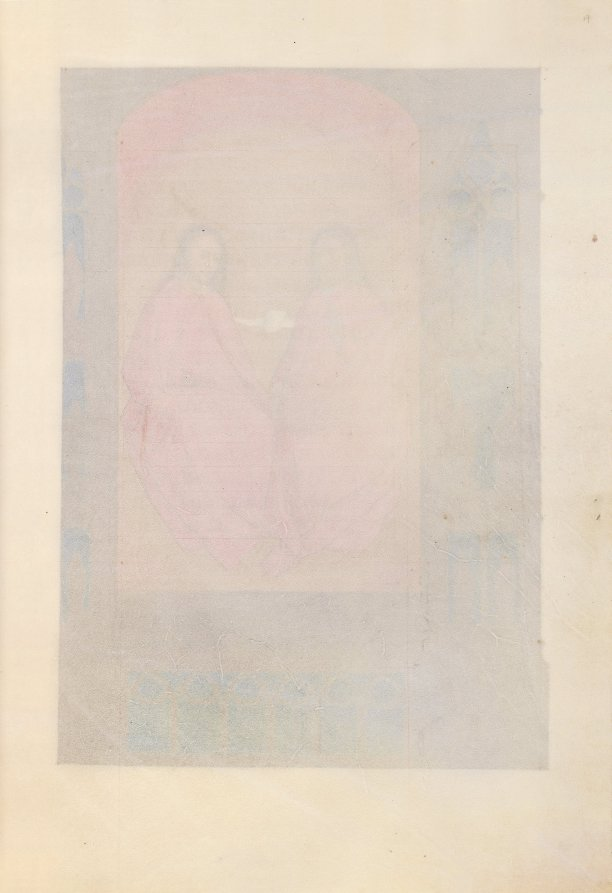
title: Hours of Queen Isabella the Catholic, Queen of Spain: Fol. 17r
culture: Flanders, Ghent and Bruges, late 15th century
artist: Master of the First Prayerbook of Maximillian (Flemish, c. 1444–1519)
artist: and Associates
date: c. 1500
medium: ink, tempera, and gold on vellum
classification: Bound Volume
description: This manuscript was illuminated by a circle of at least five highly organized manuscript painters active in the Flemish cities of Ghent and Bruges. The principal illuminator was Alexander Bening, who painted the majority of the book's miniatures. Manuscripts produced by this circle of artists are renowned for the decoration of their borders, which typically feature a rich variety of realistically-painted flowers, birds, and butterflies. This prayer book, called a book of hours, was intended not for a cleric, but for the private devotions of a lay person-in this case, Isabella the Catholic, Queen of Spain (1451-1504). Isabella's coat of arms embellishes the book's frontispiece. It is unlikely that the book was commissioned by the Queen herself; rather, she probably received it as a diplomatic gift from someone courting her patronage, perhaps Cardinal Francisco Jimenez de Cisneros. A Franciscan friar, Jimenez was dependent upon Isabella for his advancement, first to the post of Queen's confessor in 1492, and then to Archbishop of Toledo in 1495.